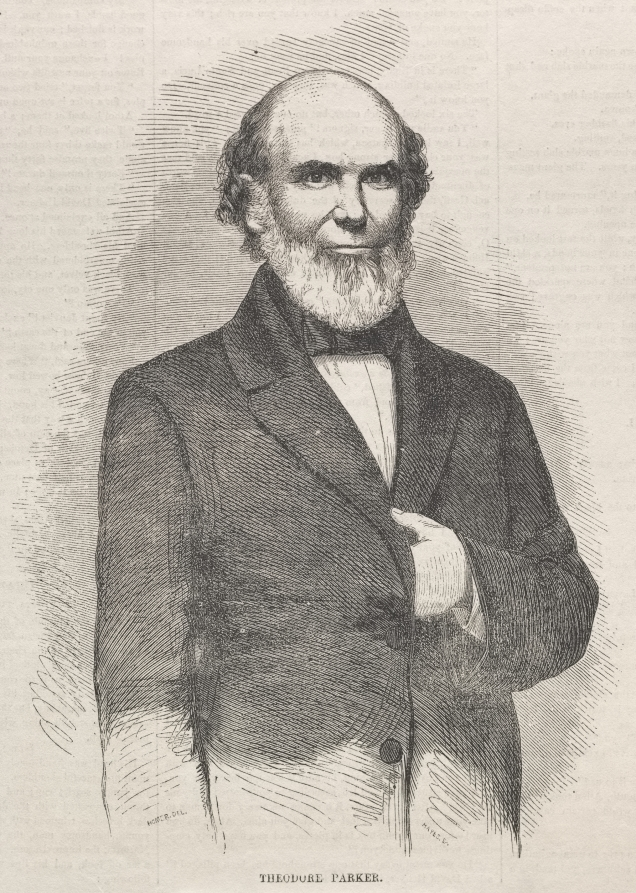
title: Theodore Parker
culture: America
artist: Winslow Homer (American, 1836–1910)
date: 1858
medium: wood engraving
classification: Print